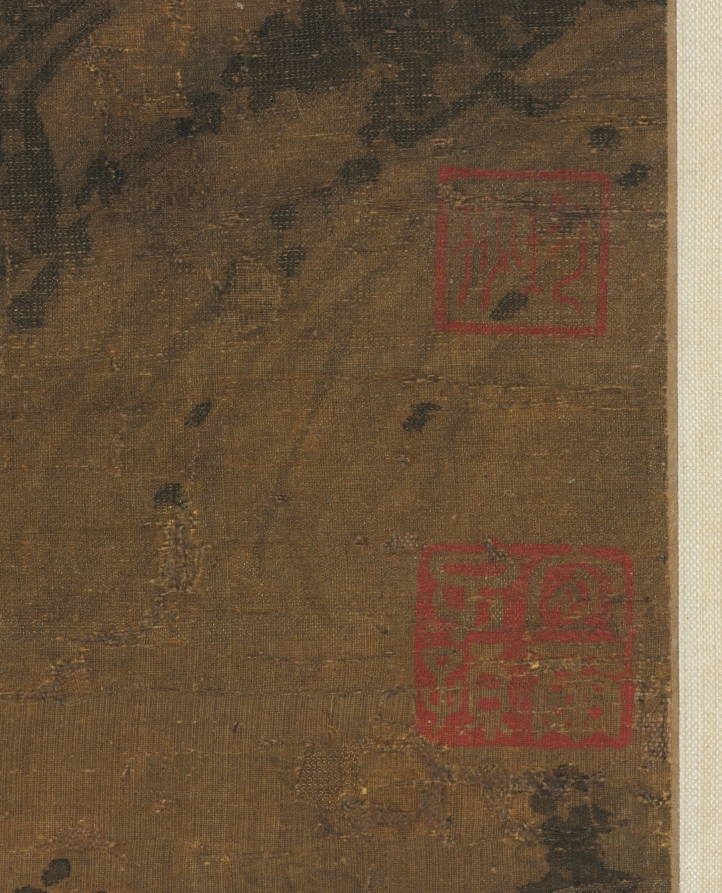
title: Summer Mountains (after Dong Yuan [active c. 937–75])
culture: China, Yuan dynasty (1271-1368)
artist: attributed to Huang Gongwang (Chinese, 1269–1354)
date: 1290–1354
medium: hanging scroll; ink and slight color on silk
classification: Painting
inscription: 【印】一峰道人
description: This monumental landscape is drawn in softly rounded strokes with darker lines frequently applied on top of lighter ones. This technique recalls one of the suggestions included in a collection of the artist's writings known as Secrets of Landscape Painting: The most difficult thing in painting is using the ink. The artist begins by using dilute ink and builds it up to the point where it begins to look right, then uses dense, black ink, applied fairly dry, and washes of deeper-toned ink. This technique distinguishes the fields from the paths, the far from the near. Huang Gongwang may have learned this technique from observing nature through the eyes of an earlier master, Dong Yuan, a painter whose style he shared.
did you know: The wet hills and moist, rich atmosphere evoke the southern Chinese summer, characterized by monsoon rains and lush growth.